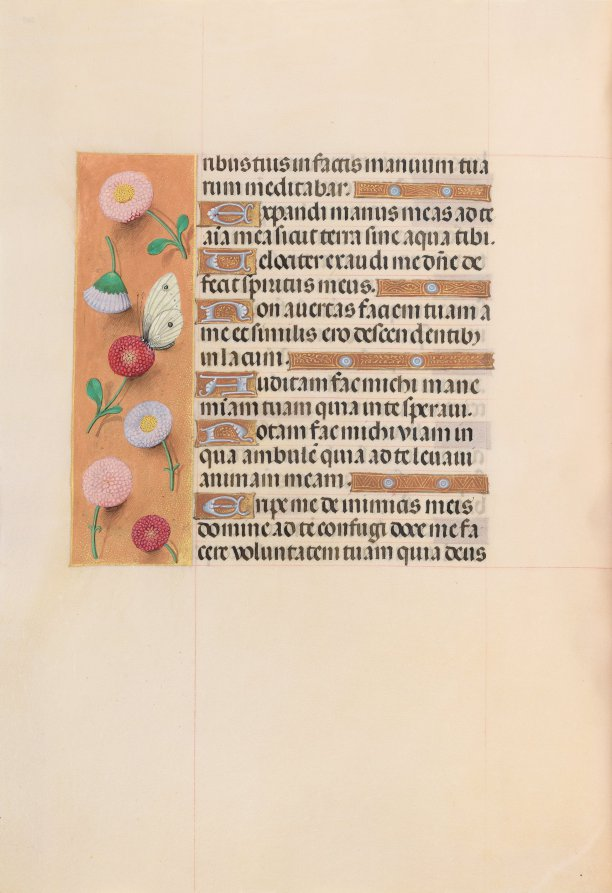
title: Hours of Queen Isabella the Catholic, Queen of Spain: Fol. 209v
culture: Flanders, Ghent and Bruges, late 15th century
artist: Master of the First Prayerbook of Maximillian (Flemish, c. 1444–1519)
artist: and Associates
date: c. 1500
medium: ink, tempera, and gold on vellum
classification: Bound Volume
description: This manuscript was illuminated by a circle of at least five highly organized manuscript painters active in the Flemish cities of Ghent and Bruges. The principal illuminator was Alexander Bening, who painted the majority of the book's miniatures. Manuscripts produced by this circle of artists are renowned for the decoration of their borders, which typically feature a rich variety of realistically-painted flowers, birds, and butterflies. This prayer book, called a book of hours, was intended not for a cleric, but for the private devotions of a lay person-in this case, Isabella the Catholic, Queen of Spain (1451-1504). Isabella's coat of arms embellishes the book's frontispiece. It is unlikely that the book was commissioned by the Queen herself; rather, she probably received it as a diplomatic gift from someone courting her patronage, perhaps Cardinal Francisco Jimenez de Cisneros. A Franciscan friar, Jimenez was dependent upon Isabella for his advancement, first to the post of Queen's confessor in 1492, and then to Archbishop of Toledo in 1495.